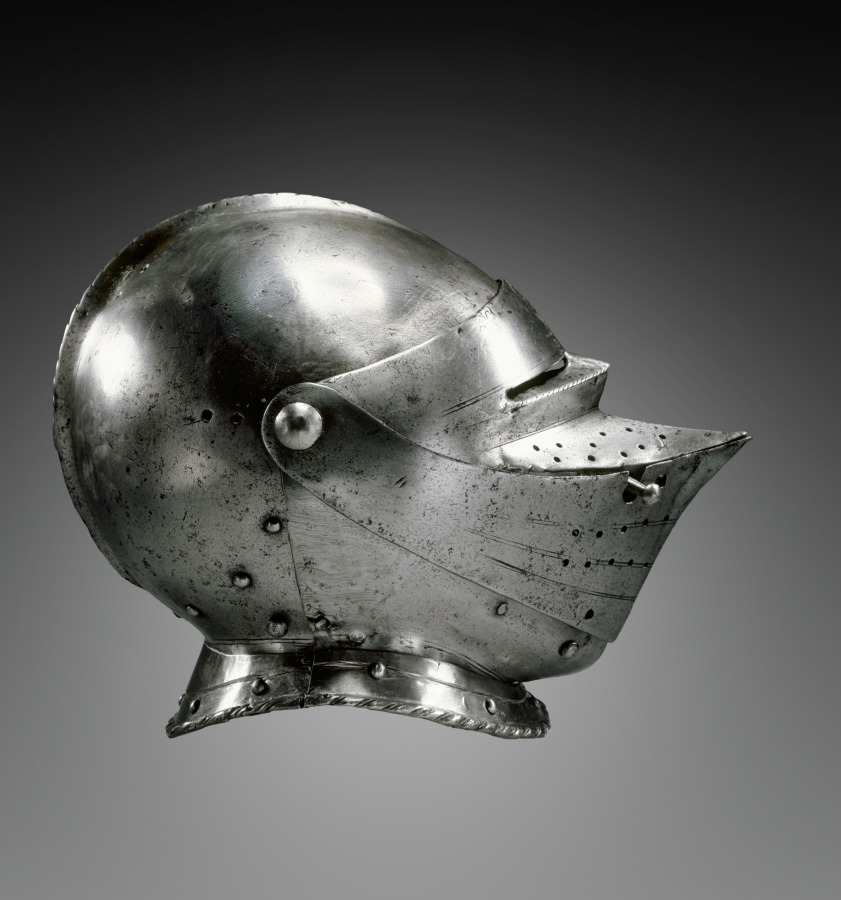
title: Close Helmet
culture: Germany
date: c. 1510–30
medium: steel with black paint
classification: Arms and Armor